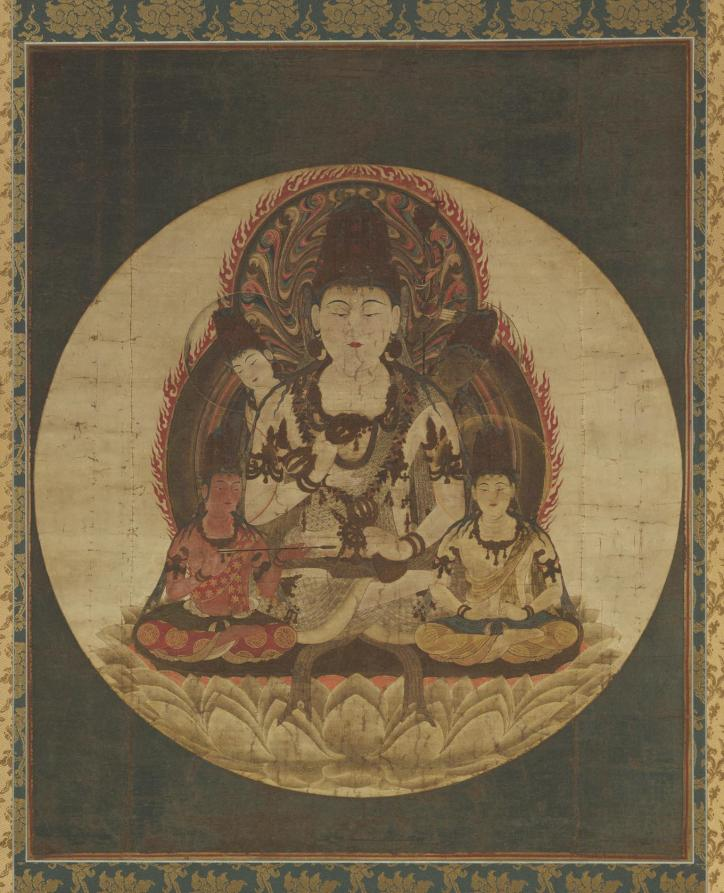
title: The Secret Five Bodhisattvas (Gohimitsu Bosatsu)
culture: Japan, Kamakura period (1185–1333)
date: 1200s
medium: hanging scroll; ink, color, gold, and silver on silk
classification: Painting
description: The Secret Five were used in a Buddhist ritual to convert negative aspects of consciousness into positive ones. At the center is Kongōsatta, who represents the enlightened mind. He is surrounded by enlightened beings who convert the human frailties of desire, sensory pleasure, passion, and pride into constructive tools to use on the path to enlightenment.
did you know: The bodhisattva Kongōsatta wears a crown containing figures of the Five Wisdom Buddhas.